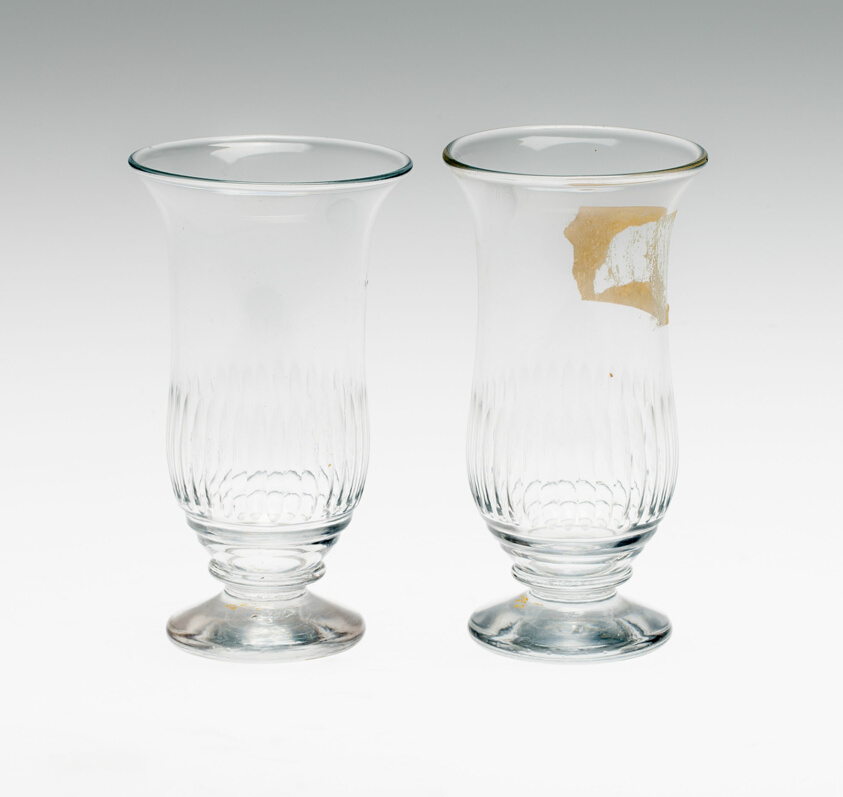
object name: Glass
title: Two Flip Glasses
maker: England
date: Late 18th century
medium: Glass; blown, molded and cut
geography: England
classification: drinking vessel; glass; european decorative arts